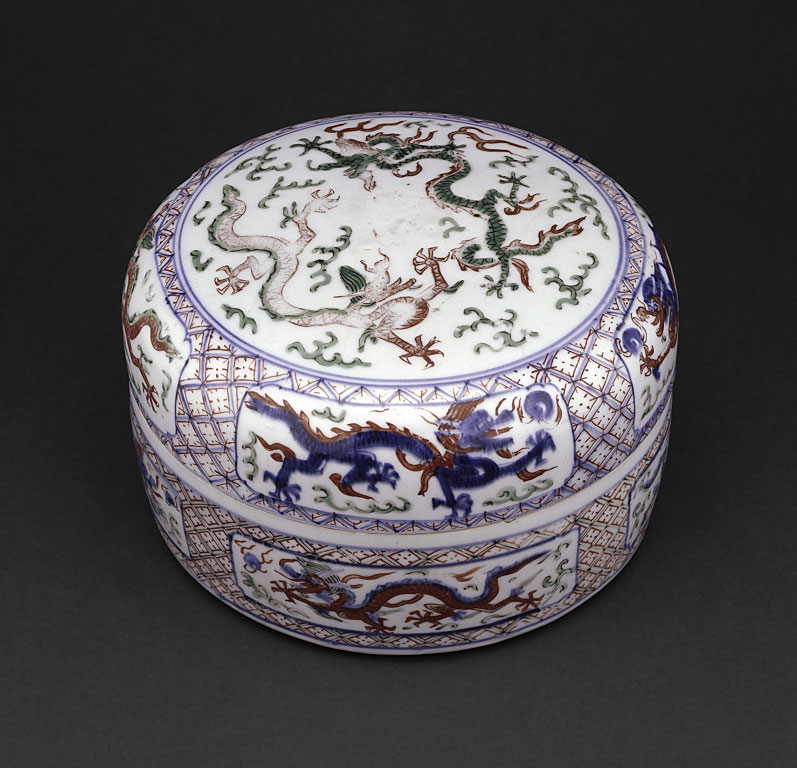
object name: Vessel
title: Wucai 'Dragon' Box and Cover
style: Chinese (culture or style)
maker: China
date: Ming dynasty (1368–1644), Wanli reign mark and period (1563–1620)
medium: Porcelain painted in underglaze blue and overglaze enamels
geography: China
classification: porcelain; ceramics; asian art; vessel